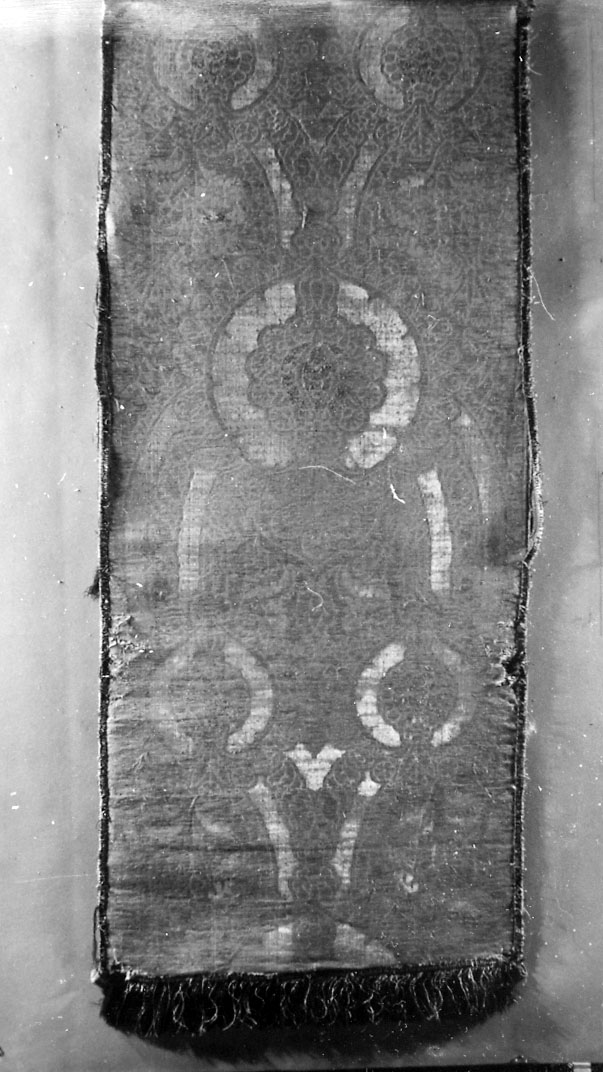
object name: Textile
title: Panel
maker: Spain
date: 15th century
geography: Spain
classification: textile; weaving